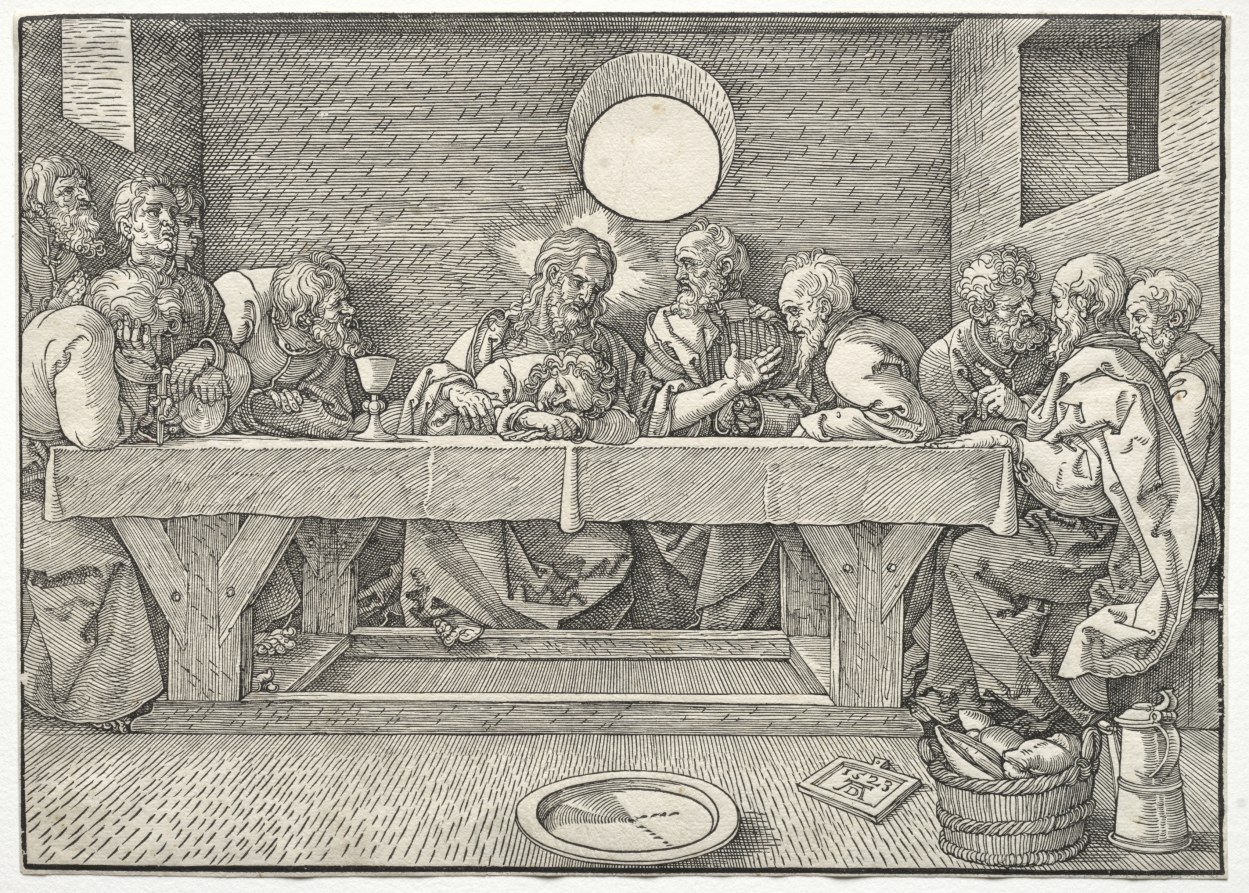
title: The Last Supper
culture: Germany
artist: Albrecht Dürer (German, 1471–1528)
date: 1523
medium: woodcut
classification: Print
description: Albrecht Dürer made this version of the Last Supper after returning from Venice. He adopted the typically Italian horizontal format, long table, and disciples seated on the far side. The table has been cleared, except for a single chalice, which, along with the empty platter, basket of bread, and wine decanter in the foreground, refers to the Christ’s body and blood in the sacrament of the Eucharist. Significantly, Judas—the disciple who would betray Christ—is not present. Some art historians interpret the scene as the moment Christ exhorts his disciples to love one another (John 13:34), a passage emphasized by the Protestant leader Martin Luther, whose Ninety-Five Theses was championed by those sympathetic to Catholic reform.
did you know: One-point perspective is a technique that artists use to render three dimensional space using a series of invisible lines converging on a vanishing point. Here, as in most last supper scenes, the vanishing point is located on the figure of Christ.